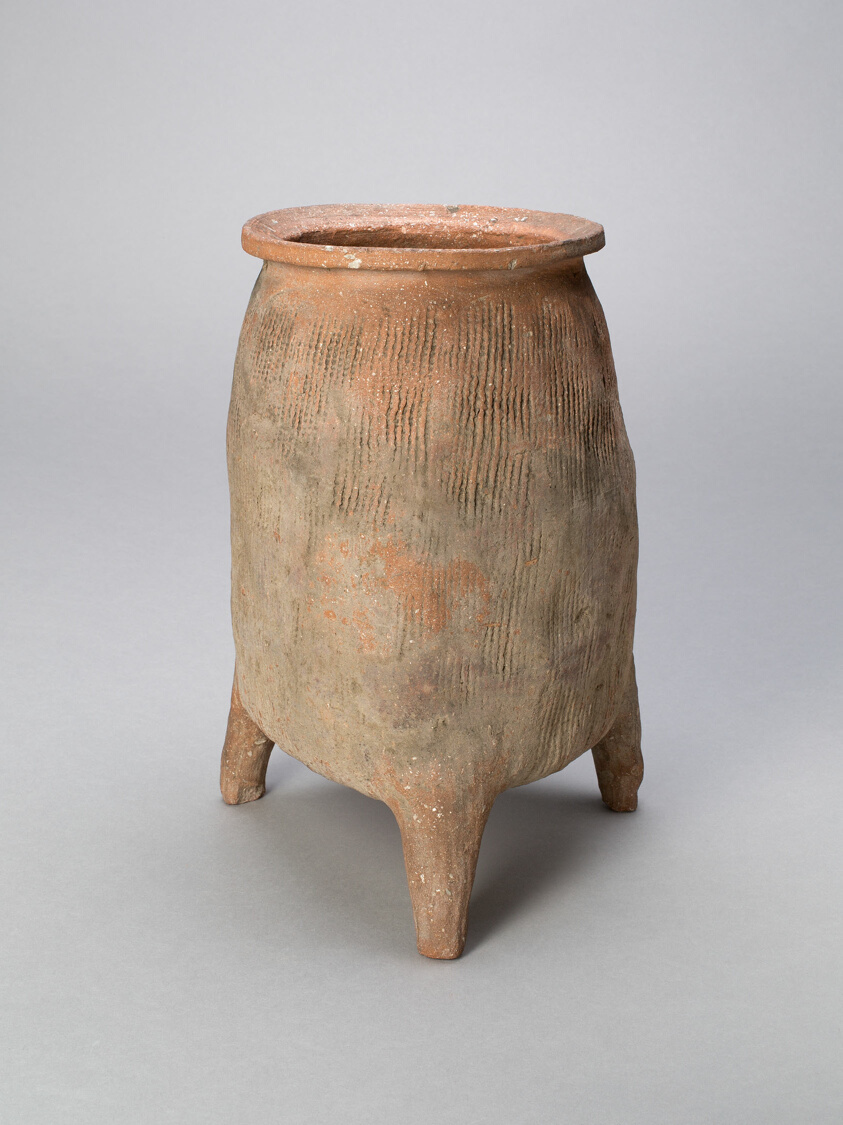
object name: Vessel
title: Tripod Vessel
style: Chinese (culture or style)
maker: China, probably Hebei province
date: Eastern Zhou dynasty, Warring States period (480–221 B.C.)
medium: Brick-red earthenware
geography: China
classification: vessel; earthenware; asian art; ceramics